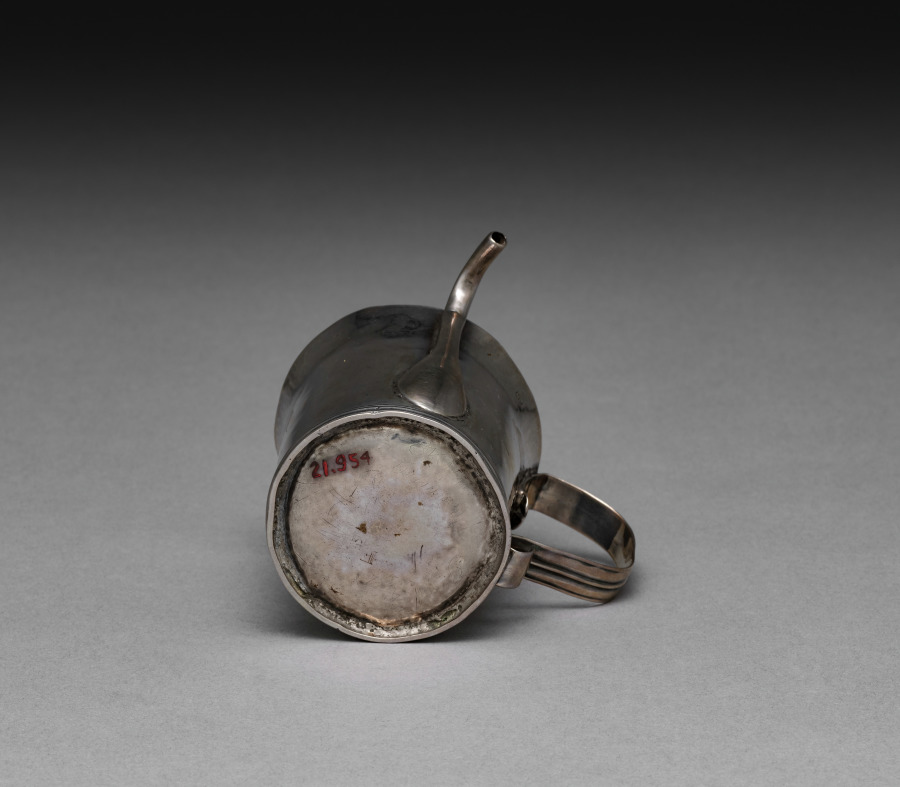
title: Spout Cup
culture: America, Massachusetts, Barnstable, 18th century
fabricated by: Moody Russell (American, 1694–1761)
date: c. 1720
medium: silver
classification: Silver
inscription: engraved ""TRA/JDA" and "THA/HGA" in bright-cut script on side, and "F" over "IM" on bottom.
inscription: Stamped on side: "MR".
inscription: Engraved underside: "F".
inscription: Scratched underside: multiple illegible words